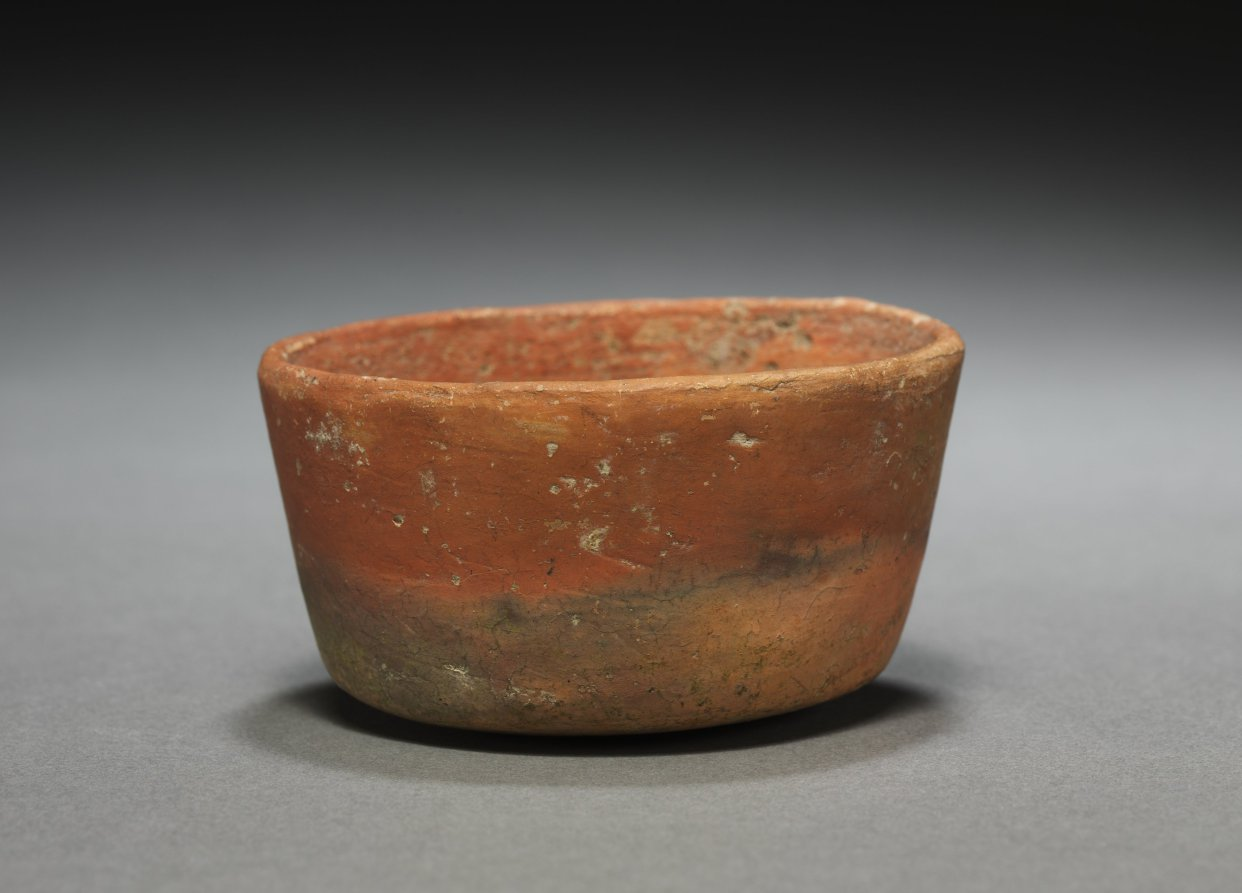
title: Cup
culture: Iran, Luristan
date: 3000–2000 BCE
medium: earthenware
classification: Ceramic